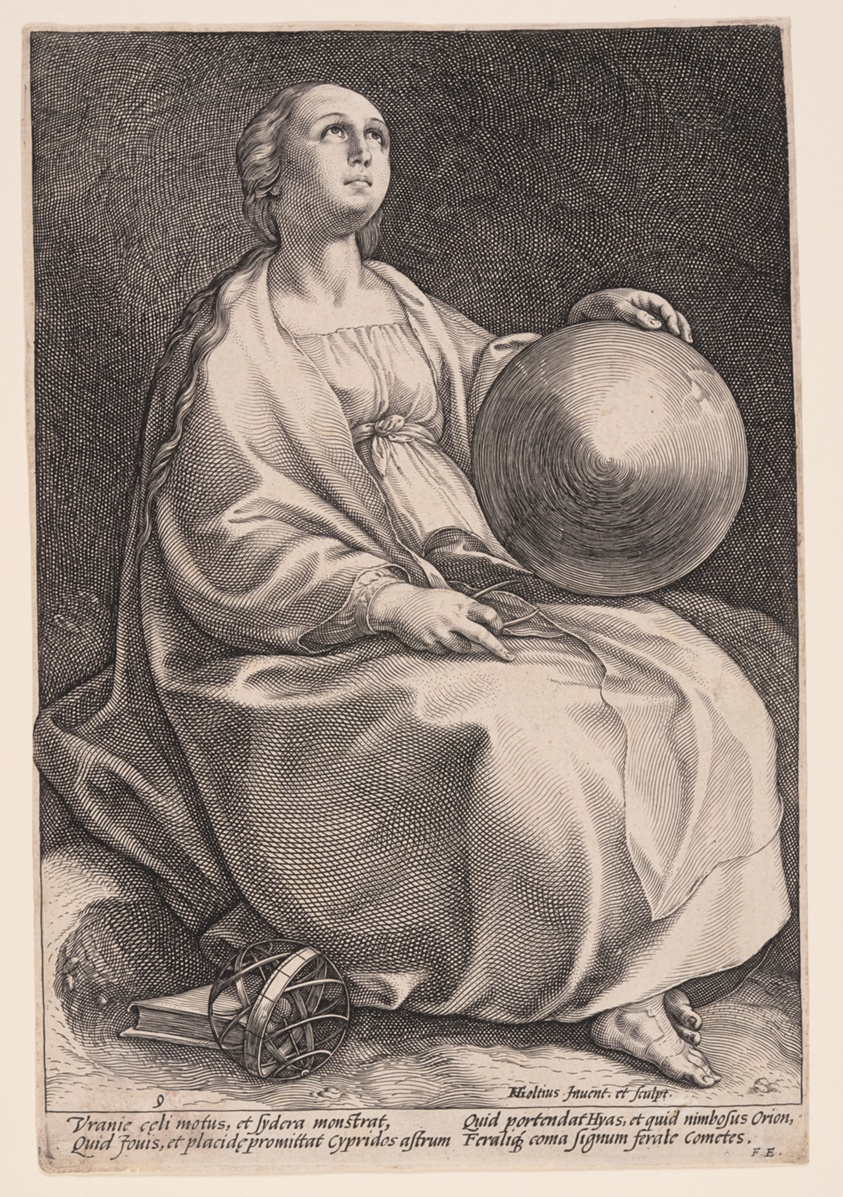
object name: Print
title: Urania, The Muse of Astronomy, from The Nine Muses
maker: Hendrick Goltzius (Dutch, 1558–1617)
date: 1592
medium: Engraving on laid paper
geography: Netherlands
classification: print; engraving; paper; prints and drawing